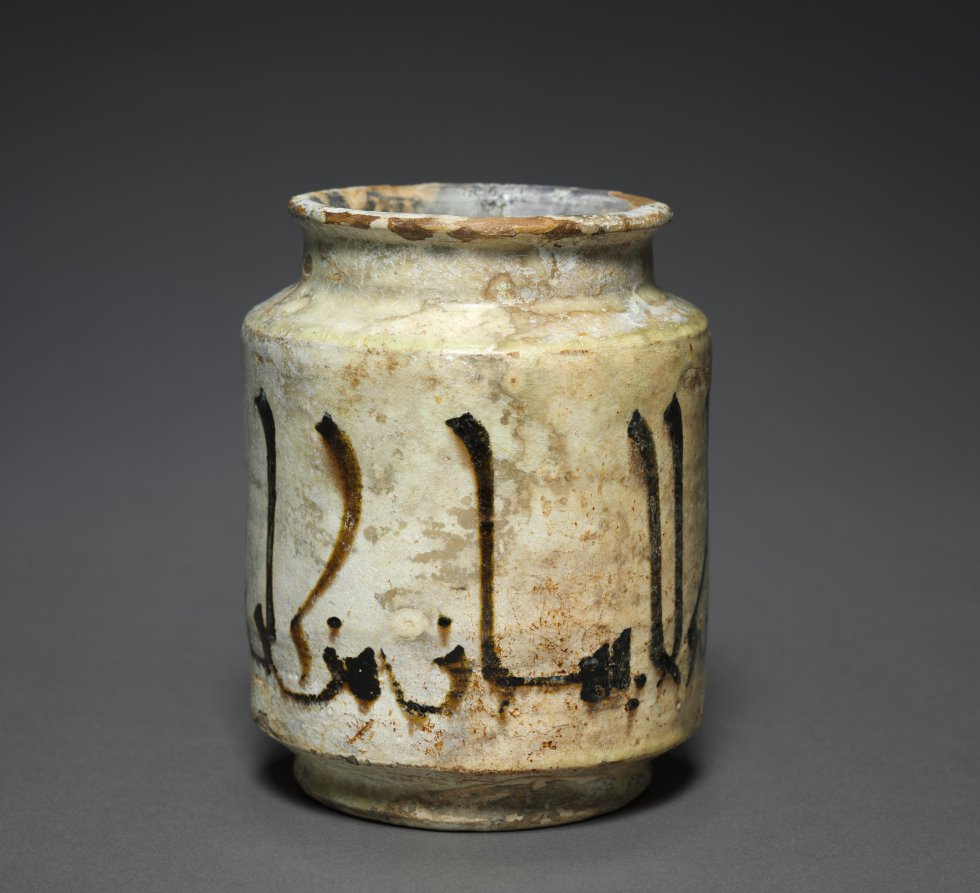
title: Albarello Jar with an Aphorism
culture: Central Asia, Samarkand, Samanid period (819–1005)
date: 900s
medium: Earthenware with underglaze decoration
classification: Ceramic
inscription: In Arabic: al-haya min al-iman w'al-iman min al-janna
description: The albarello was a jar designed to hold ointments and drugs for pharmacists. They were produced in the Middle East and Spain, as well as late medieval and Renaissance Italy. Albarellos are usually painted with floral, vegetal, or geometric designs. Arabic inscriptions are less common but here the elegant text reads: “Modesty [comes] from faith, and faith [comes] from Paradise,” attributed to the Prophet Muhammad.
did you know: The jar's Arabic inscription written in Eastern Kufic script.